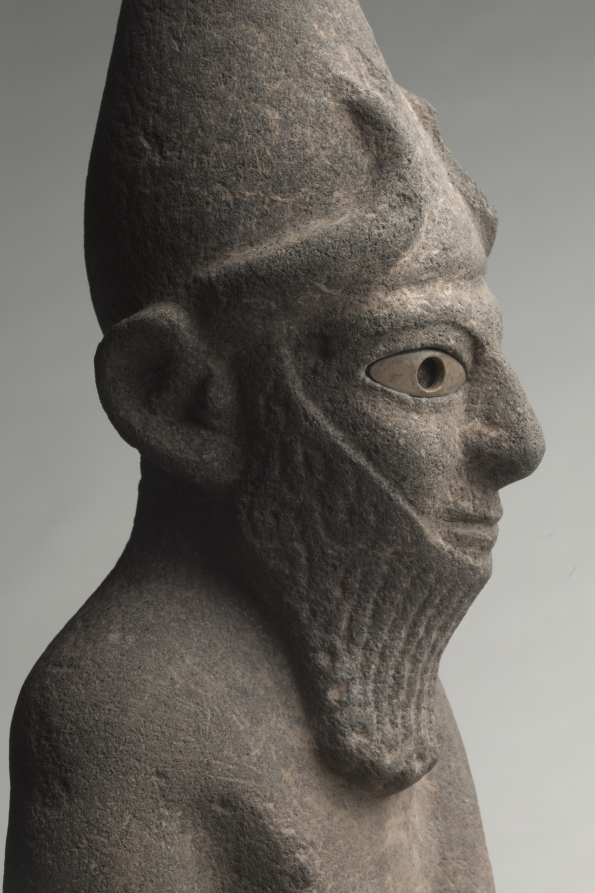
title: Priest-King or Deity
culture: Hittite, North Syria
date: c. 1600 BCE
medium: basalt with bone eyes (left, ancient; right, restored)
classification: Sculpture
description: The Hittites migrated into Anatolia in the 3rd millennium BCE and spoke an Indo-European language, a group that includes Greek, Latin, Persian, Sanskrit, English, and most modern European languages. They were the first ancient people to use iron for weapons. From about 1600–1200 BCE their empire was at its peak, extending from central Anatolia to Syria, and south along the eastern Mediterranean. Their vast empire and interest in commerce enabled the Hittites to spread Mesopotamian ideas and culture throughout the ancient Mediterranean world. This large basalt sculpture is exceptionally rare in depicting a Hittite god or priest-king wearing a horned conical crown, false beard, and long robe. He holds a bowl in his right hand and once held something in his left, perhaps a staff or sword.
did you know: The left eye of the sculpture is the original bone inlay while the right eye is a modern restoration done after the piece was damaged.